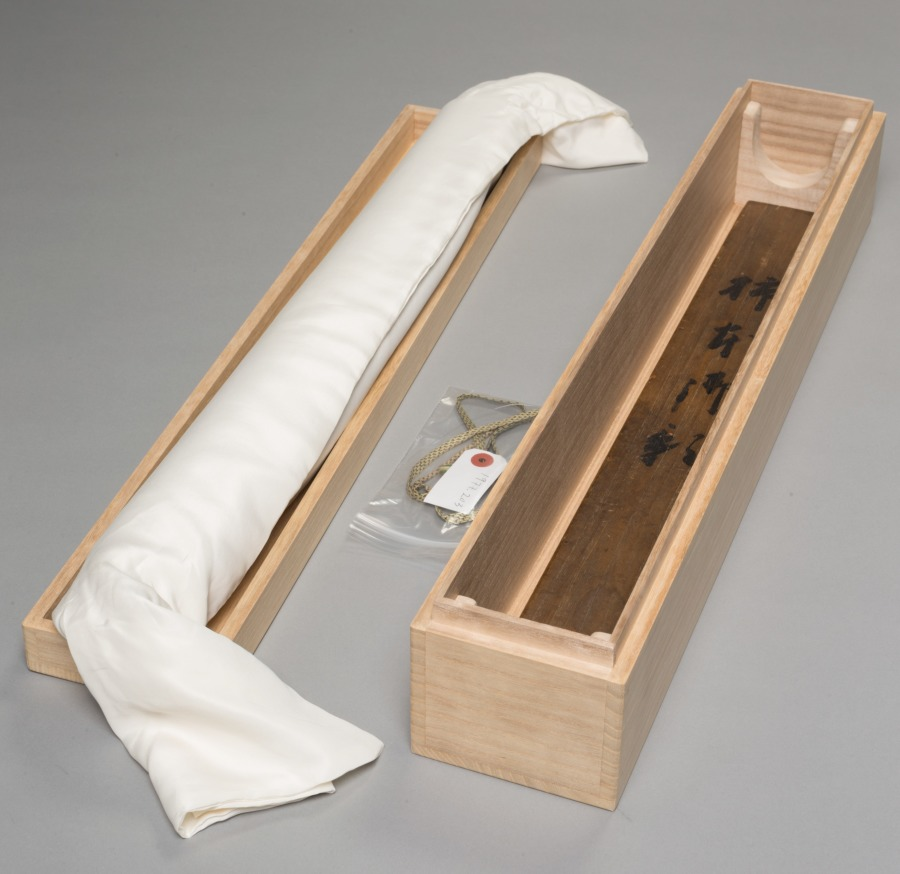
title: Kakinomoto no Hitomaro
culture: Japan, Kamakura period (1185–1333)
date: early 1300s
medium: hanging scroll; ink and color on silk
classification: Painting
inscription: 浦のあさ霧にしま隠れゆく舟をしぞ思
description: Among Japan’s greatest poets, Kakinomoto no Hitomaro’s (c. 660–724) portrait was often displayed at poetry competitions. Here, he gazes up at a falling cherry blossom, his writing box before him, brush and paper in his hands. A short biography and one of his poems are inked on painted rectangles meant to look like decorated papers. The first part of the poem has been mostly lost, but from what remains, it is possible to recognize it as Dimly, dimly in the morning mist that lies over Akashi Bay, my longings follow with the ship that vanishes behind the distant isle. —Translated by Robert H. Bower and Earl Roy Miner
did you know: The landscapes at the top and bottom of the painting depict Akashi Bay, with its famous pines along the shore, and a lone figure in a boat.